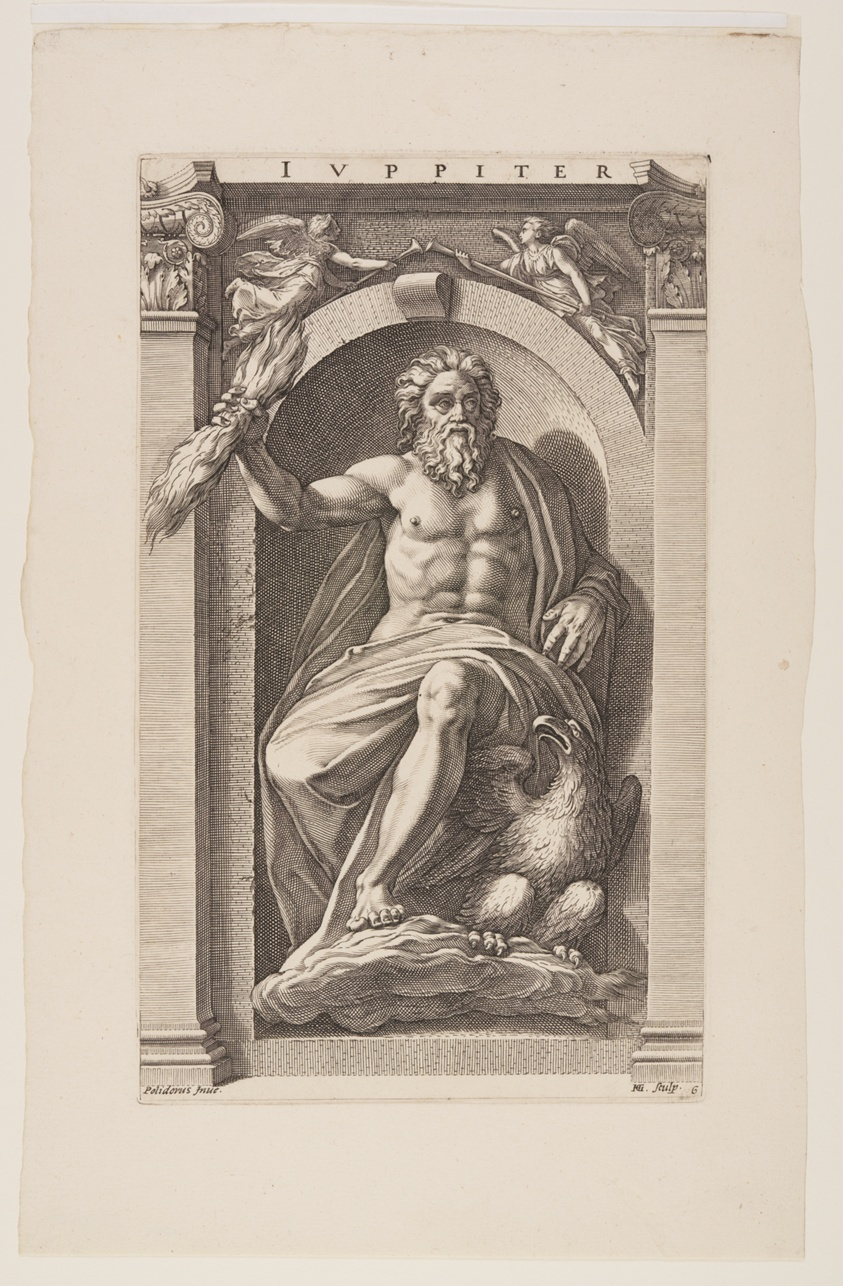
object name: Print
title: Jupiter, from Eight Pagan Gods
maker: Hendrick Goltzius (Dutch, 1558–1617); after Polidoro da Caravaggio (Italian, c. 1499–c. 1543)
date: 1592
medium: Engraving on ivory laid paper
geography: Netherlands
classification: print; paper; prints and drawing; engraving